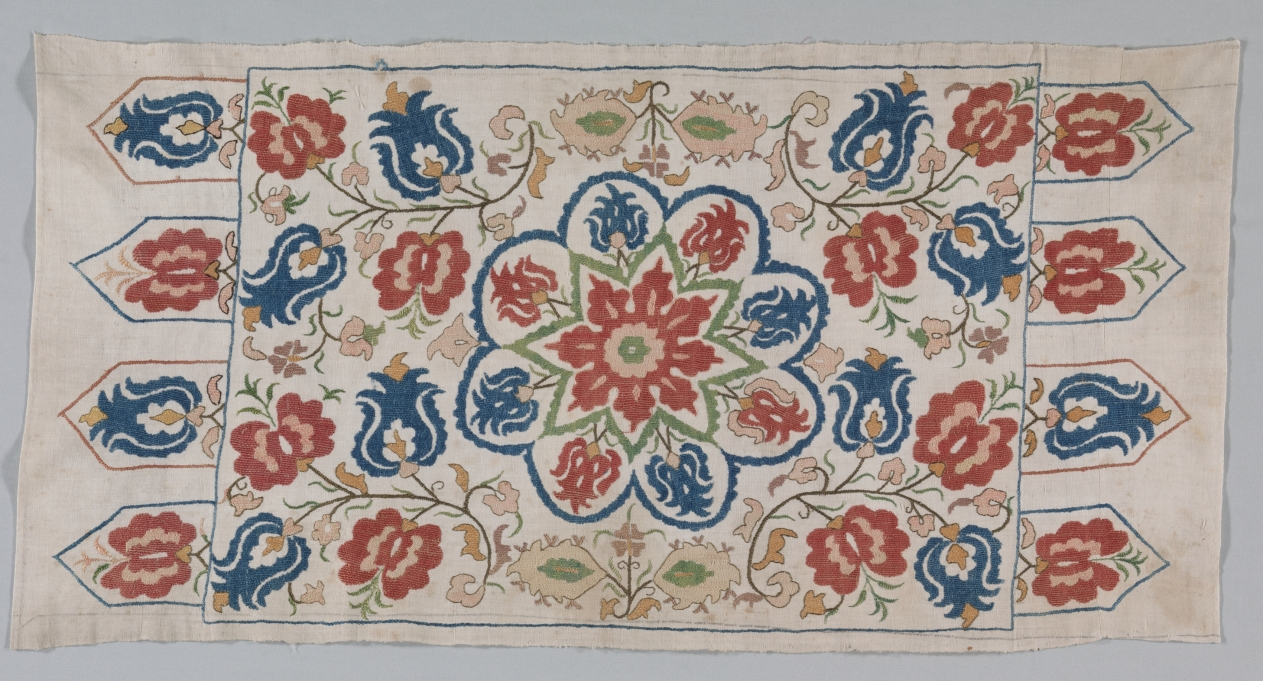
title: Embroidered cushion cover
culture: Turkey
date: 1700s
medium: plain weave: linen; embroidery, self-couching and herringbone stitches: silk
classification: Embroidery